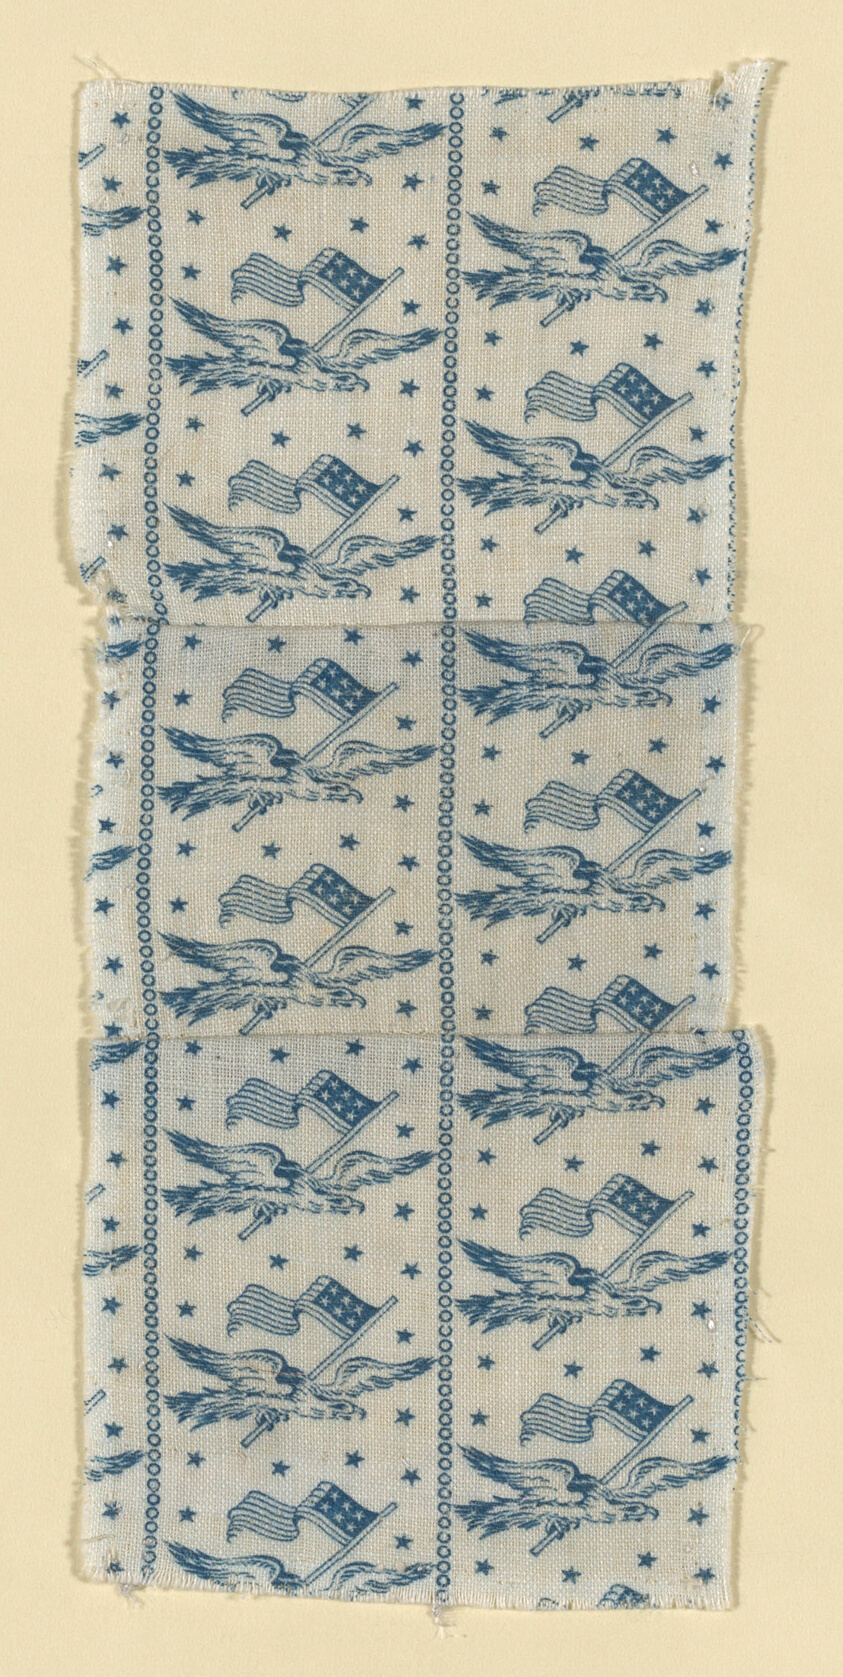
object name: Textile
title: Fragment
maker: United States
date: 1876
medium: Cotton, plain weave; roller printed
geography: United States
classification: textile; weaving - printed; furnishing textile